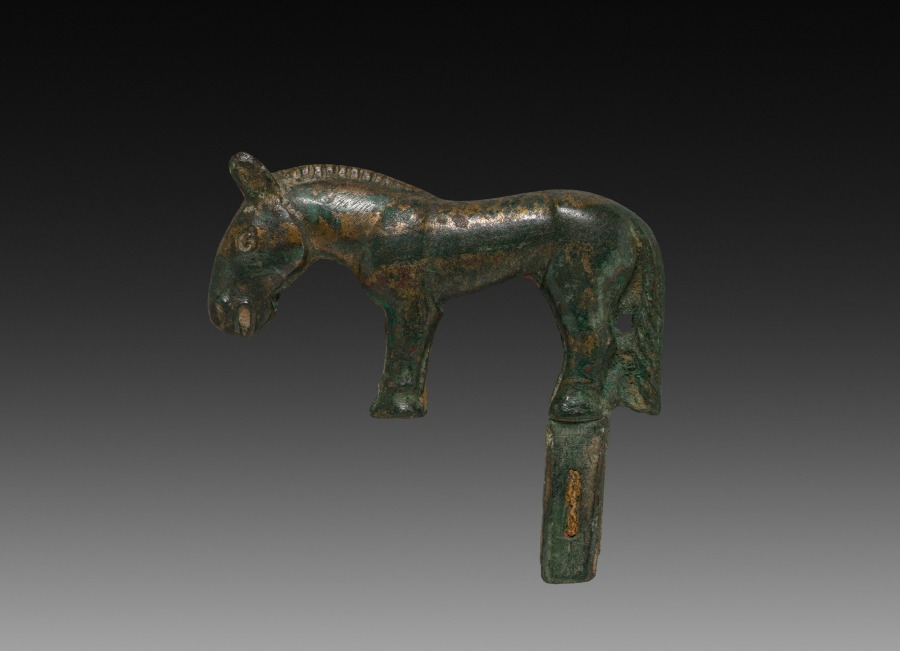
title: Wild Horse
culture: China, Ordos Region, Han dynasty (202 BCE–220 CE)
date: c. 100 BCE–100 CE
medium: cast bronze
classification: Sculpture